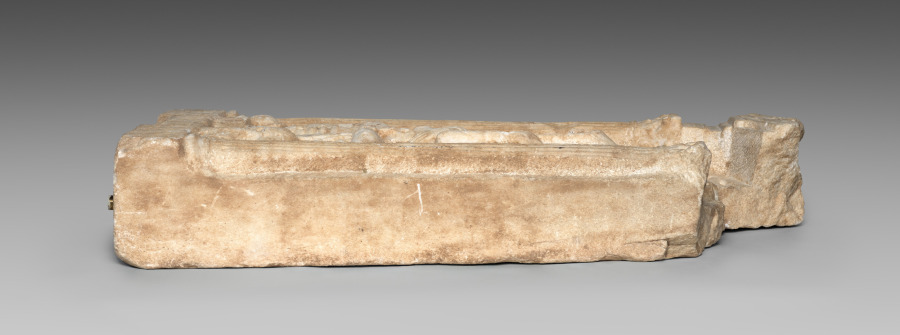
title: Grave Stele (Relief)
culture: Southern Anatolia, Pamphylia, Hellenistic Greek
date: c. 50 BCE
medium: marble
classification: Sculpture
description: The multiple figures, inscription, use of perspective, and architectural frame distinguish this ambitious relief as one of the most important of its type. The Greek inscription on the base reads, “To Sbardia, also named Tate, Eumelos, son of Aphrodisios, her father, [set this up].” The deceased is shown seated on an elaborate chair. A servant girl holding a fan suggests Sbardia’s high social standing. At the bottom right corner, a hen perches on an upturned basket, a symbol of “the good life.” The stele incorporates a “springing” gable supported by engaged half columns with simplified Corinthian capitals. Other features relate to beliefs about mortality and the afterlife. Above and to the left of her chair is her winged psyche (soul) shown leaving her body. Figures of the three fates are shown in the pediment above, reminding us that human life is finite.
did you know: The seated woman is depicted larger to visually emphasize her importance; her servant is in the background.